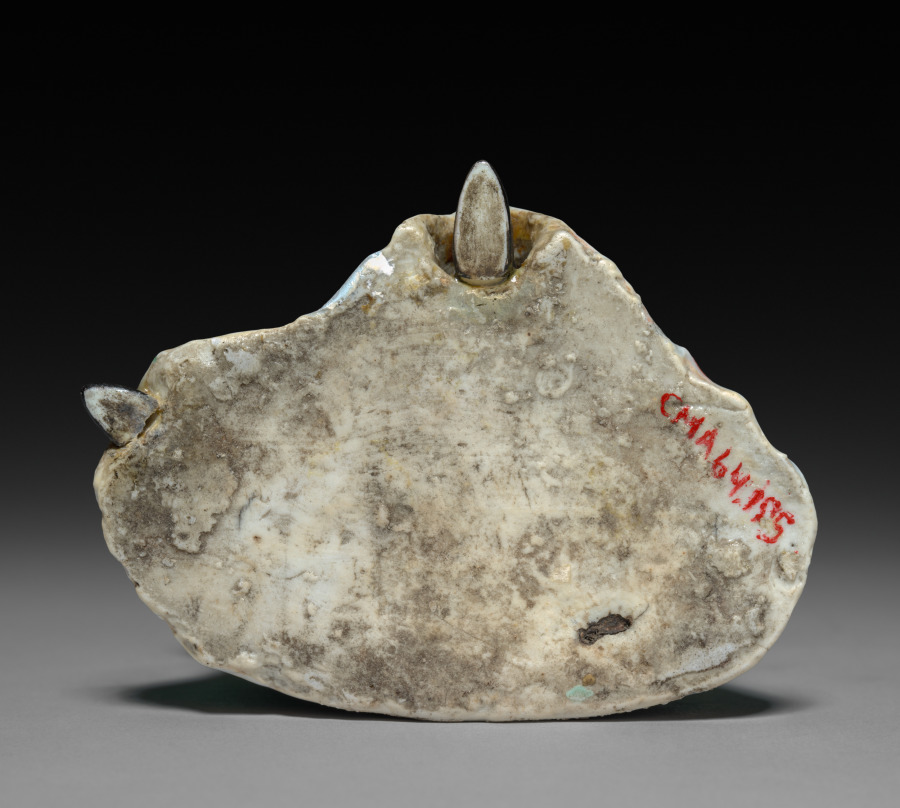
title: Court Lady Holding a Sheng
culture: China, Jiangxi province, Jingdezhen kilns, Qing dynasty (1644-1911), Kangxi reign (1662-1722)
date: 1662–1722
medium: porcelain with famille verte overglaze enamel decoration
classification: Ceramic